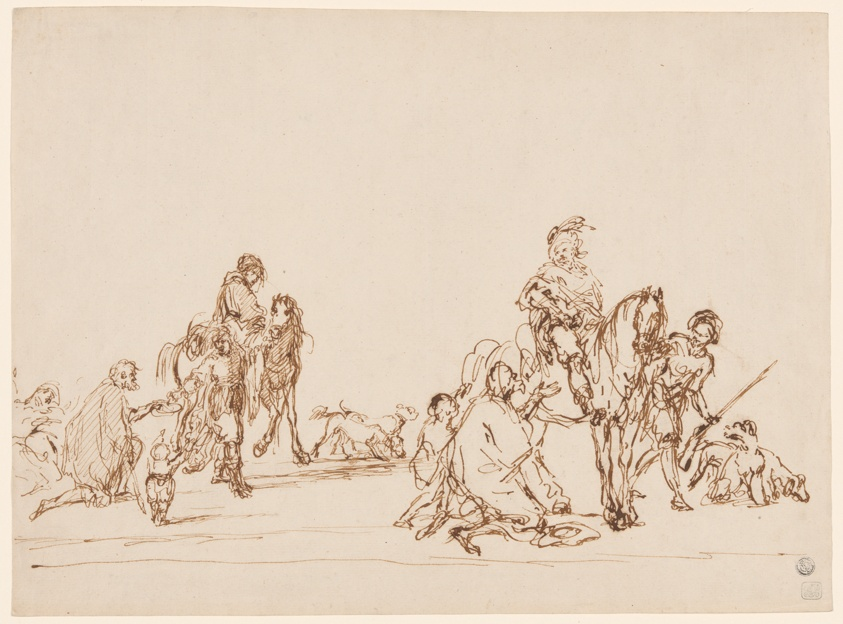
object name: Drawing and Watercolor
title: Hunters Giving Alms to Beggars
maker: Attributed to Carel van Falens; Flemish, 1683-1733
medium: Pen and brown ink on ivory laid paper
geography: Flanders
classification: pen and ink drawings; drawings (visual works); prints and drawing